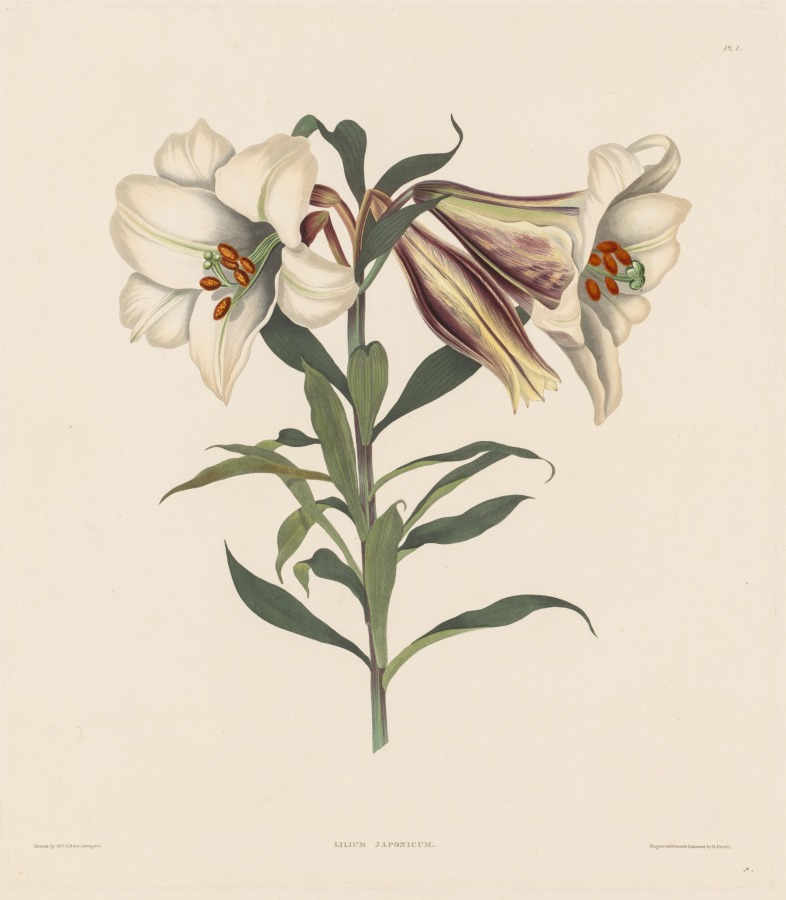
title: A Selection of Hexandrian Plants, belonging to the natural order of Amaryllidae and Liliacae: Japanese Lily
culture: England, 19th century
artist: Robert Havell (British, 1769–1832)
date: 1831–1832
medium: aquatint and etching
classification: Print